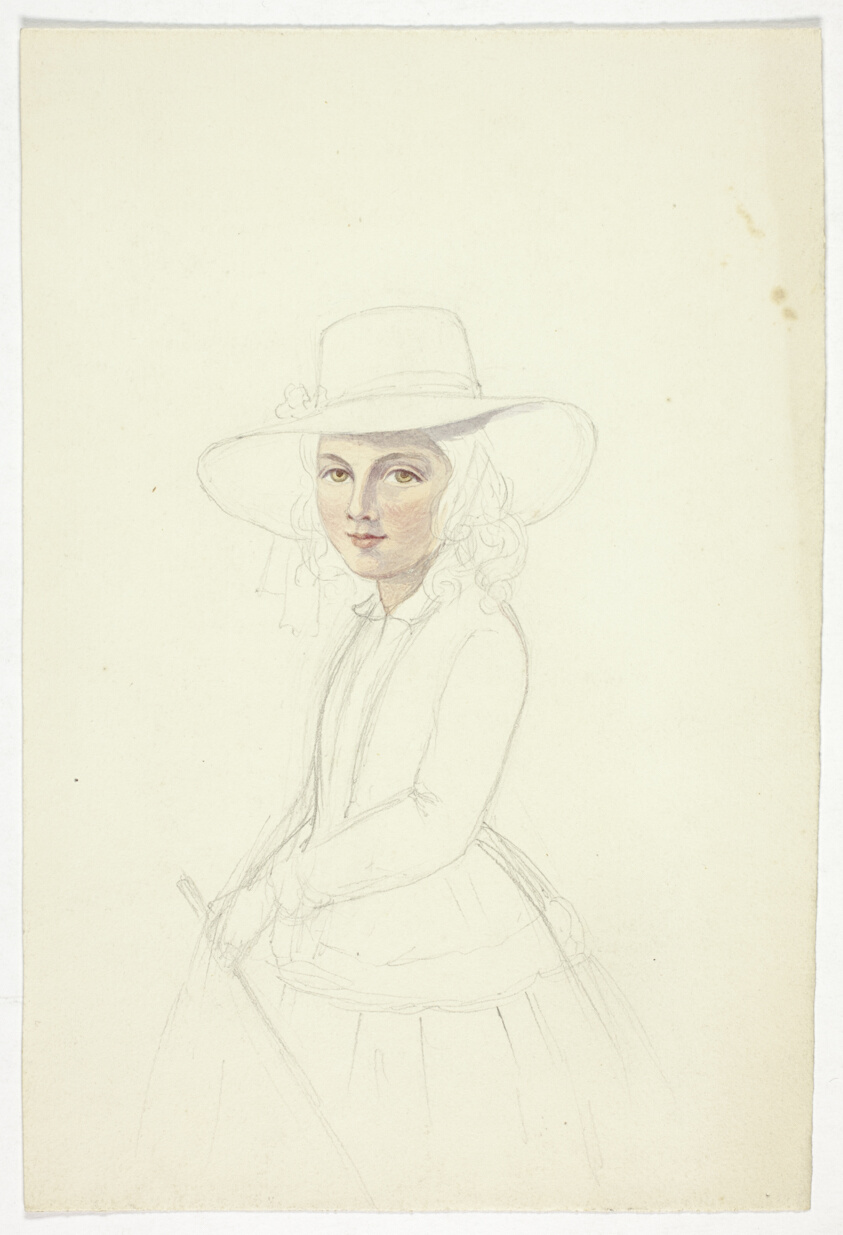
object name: Drawing and Watercolor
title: Portrait of Young Girl with Hat and Crop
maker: Elizabeth Murray (English, c. 1815-1882)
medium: Watercolor over graphite on cream wove paper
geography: England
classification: watercolor; drawings (visual works); prints and drawing